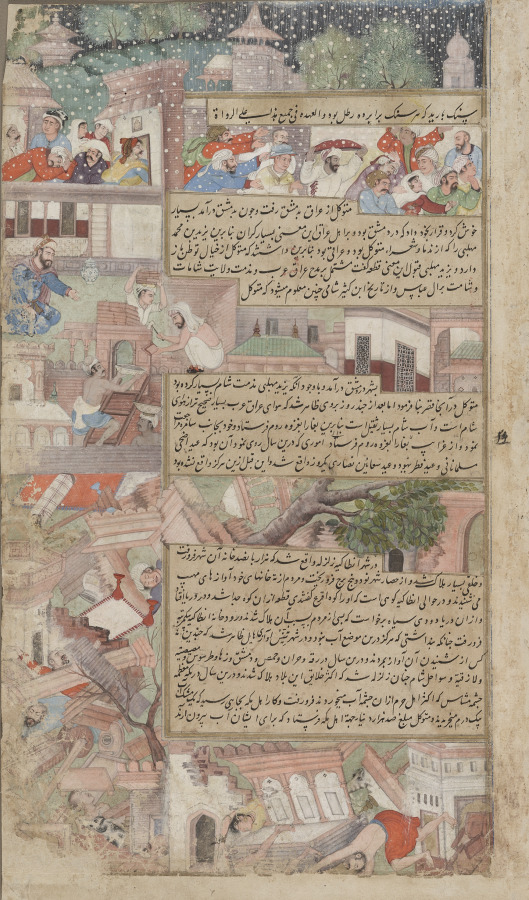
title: Page of disasters, from the Tarikh-i Alfi (History of the Thousand [Years])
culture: India, Mughal, 16th century, made for Akbar (reigned 1556–1605)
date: c. 1595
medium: Gum tempera, ink, and gold on paper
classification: Painting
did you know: Devastation after an earthquake includes a horse trapped under a fallen pavilion.